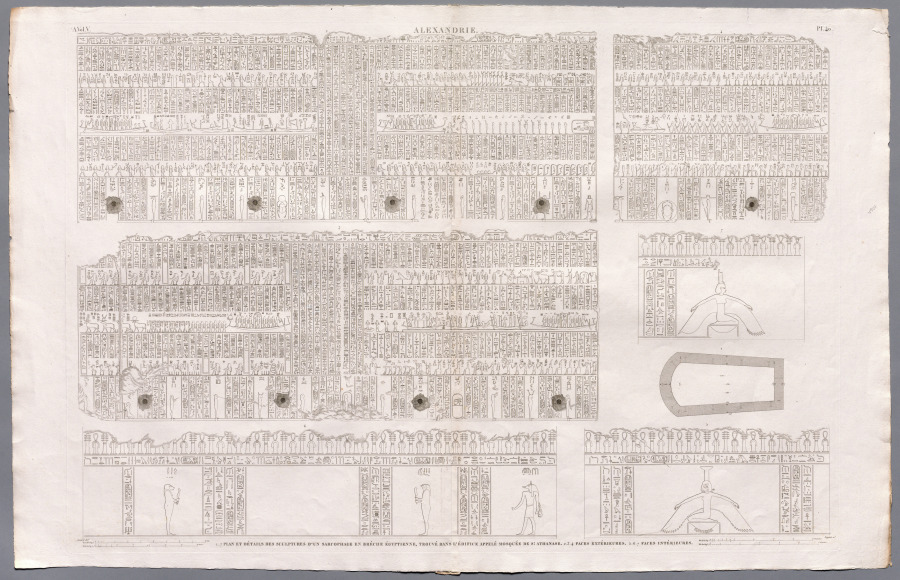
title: Description of Egypt: Memphis and Environs, Alexandria, Vol. V, Pl. 40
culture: France, 19th century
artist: Baptiste Bigant (French)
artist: after Edmé-François Jomard (French, 1777–1862/63)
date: c. 1822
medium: etching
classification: Print